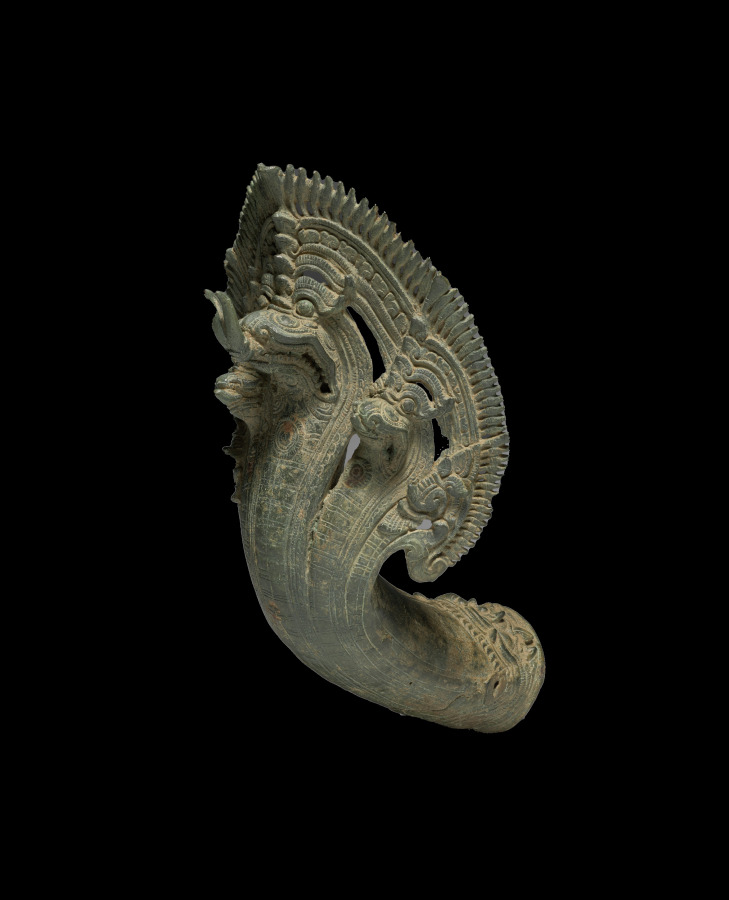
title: Naga Finial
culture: Cambodia, Angkor Wat period, 1100s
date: 1100s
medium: bronze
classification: Metalwork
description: When members of the royal family or priesthood traveled in a public festival procession or to a temple to make offerings or participate in a ceremony, they would be carried in a palanquin, or a covered litter. Portable objects of veneration, such as bronze images or a sacred fire, were also carried on palanquins. The palanquins had wooden poles, hanging seats or raised platforms, and bronze fittings cast in intricate forms and gilt, lending the palanquins a sumptuous quality. The royal palanquins were typically fitted with multiheaded, serpent-shaped finials at the ends of the poles and corners of the elevated platforms. Naga means serpent in Sanskrit, a language from India selectively appropriated by the Khmer in Cambodia. In their own indigenous mythology, the Khmer people trace their descent from a naga princess and a prince from the island of Java who journeyed to Cambodia. The naga remains a potent emblem for the Khmer nation to this day; it is ubiquitous on Cambodian monuments.